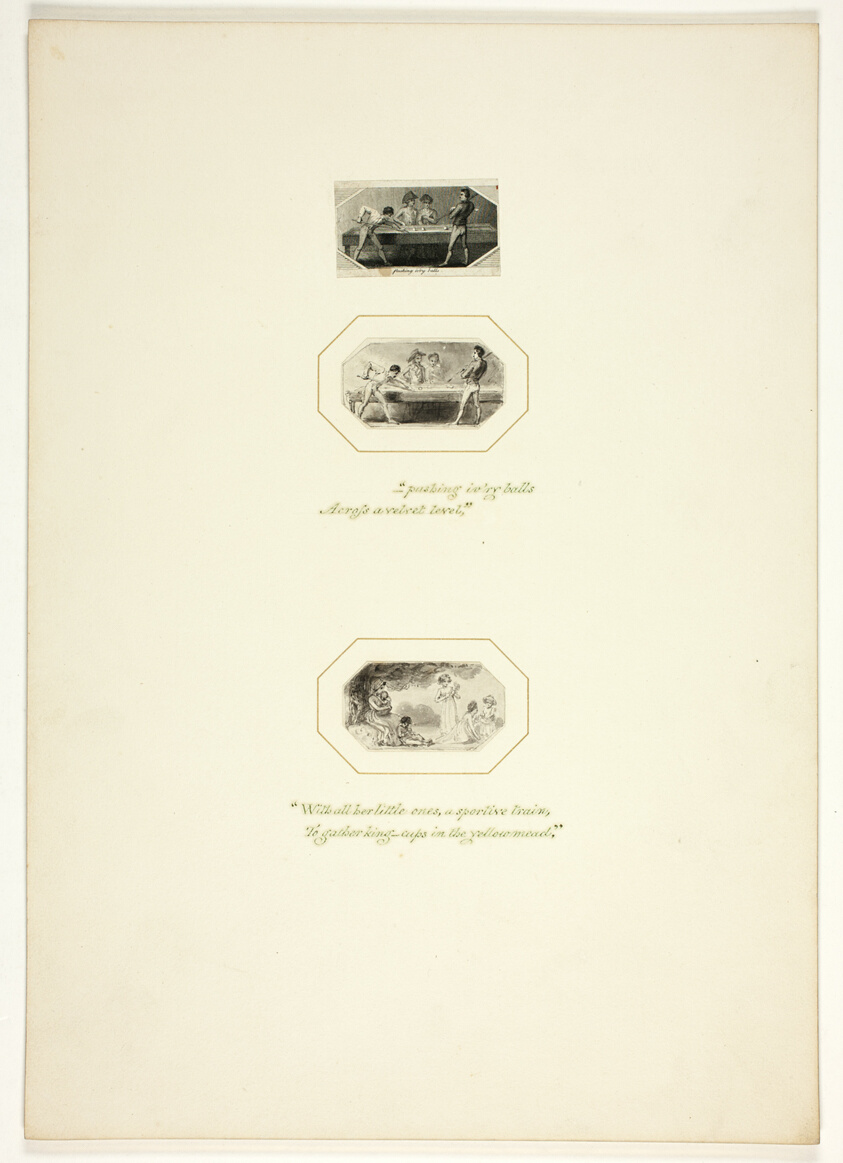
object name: Drawing and Watercolor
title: Study for a plate from The Task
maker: Thomas Stothard (English, 1755-1834)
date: c. 1800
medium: Ink wash on paper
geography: England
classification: ink or chalk wash; drawings (visual works); prints and drawing